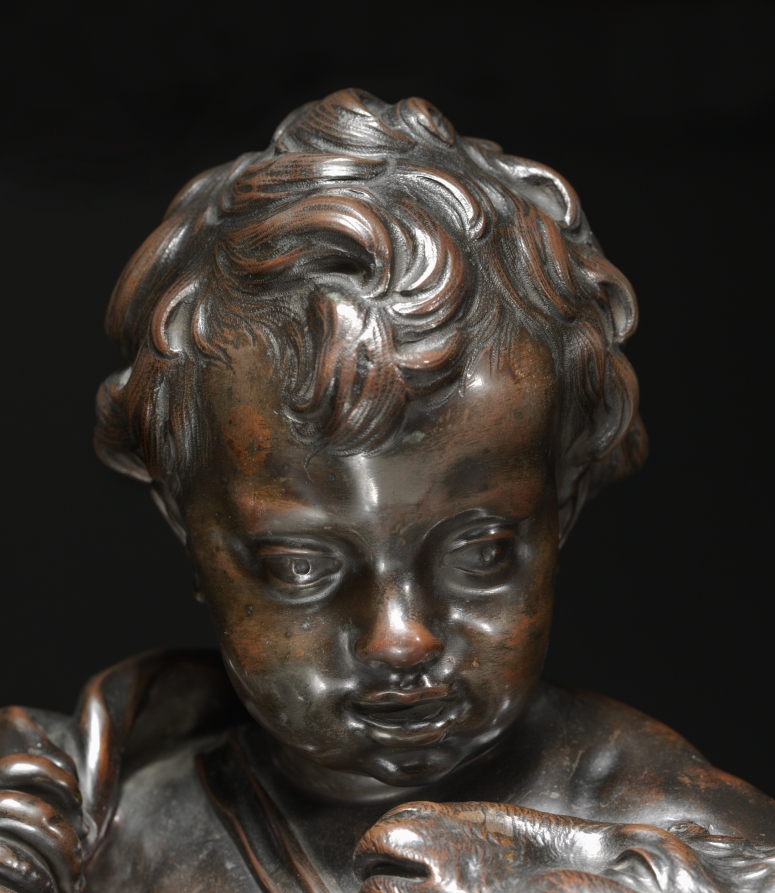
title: Young Saint John and the Lamb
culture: Italy, Florence, 17th century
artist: probably by Giuseppe Piamontini (Italian, 1664–1742)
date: c. 1680–1700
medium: bronze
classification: Sculpture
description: John the Baptist is often accompanied by a lamb as a sign of his intimacy with Christ, the Lamb of God. The depiction of children embracing animals is a motif from antiquity that Piamontini would have known.